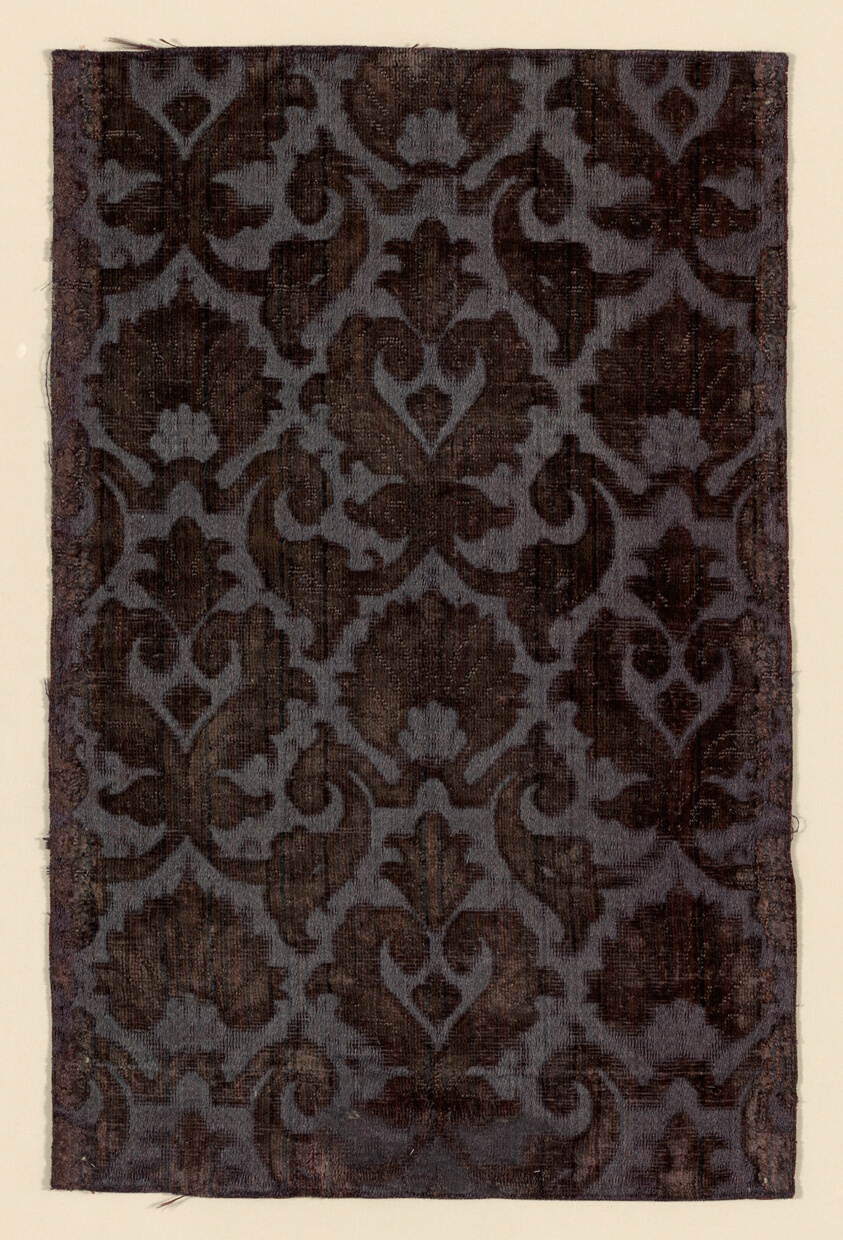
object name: Textile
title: Fragment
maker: Italy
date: First half of the 17th century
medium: Satin ground; pattern cut velvet outlined with uncut velvet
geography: Italy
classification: textile; weaving - velvet; weaving